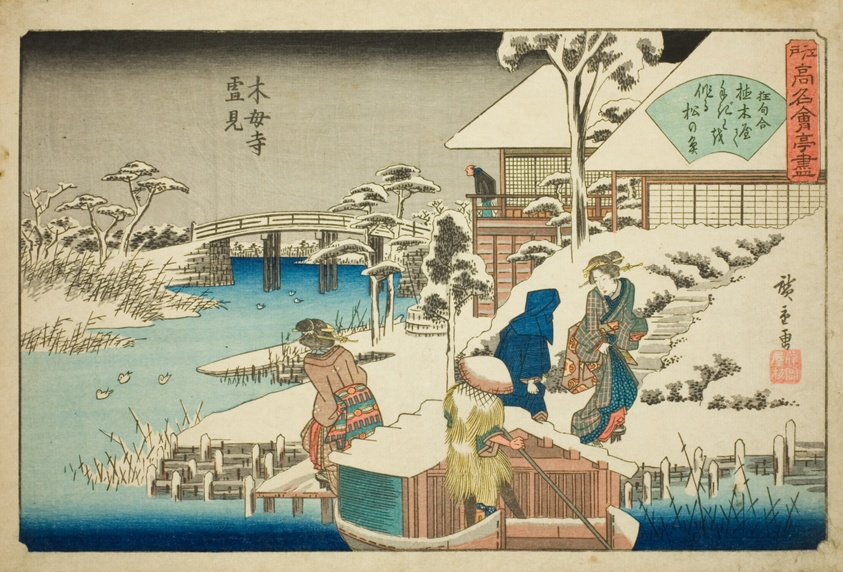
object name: Print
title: Viewing Snow at the Uekiya Restaurant at Mokubo Temple (Mokuboji yukimi, Uekiya) from the series "Famous Restaurants of Edo (Edo komei kaitei zukushi)"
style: Japanese (culture or style)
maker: Utagawa Hiroshige 歌川 広重; Japanese, 1797-1858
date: c. 1838/40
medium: Color woodblock print; oban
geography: Japan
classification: woodblock print; print; asian art